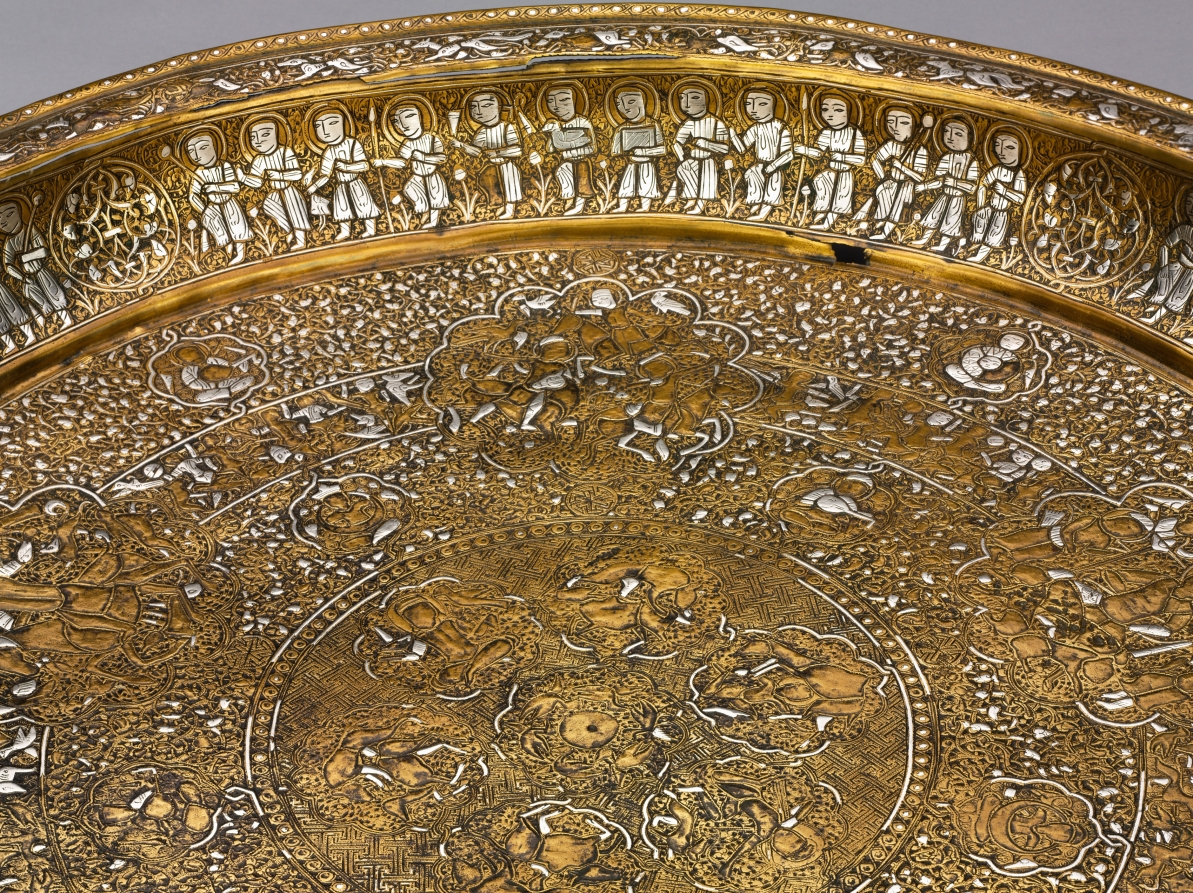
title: Tray Portraying Courtly Pleasures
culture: Syria, Ayyubid period (1171–1260)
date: 1240s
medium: sheet brass inlaid with silver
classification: Metalwork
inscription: The presence of ligatures in the narrow circular bands with interconnected human and animal figures suggests this may be a degenerate form of animated script. It is indecipherable.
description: This tray features images of courtly life interspersed with astronomical symbols. The scenes contained within large multilobed medallions display an enthroned prince with lions at his feet, a banquet, a hunt, dancers, and musicians. Contained within the concentric circles there are also references to solar and lunar motifs, including figures holding sunbursts and lunar crescents. This tray is made of a single sheet of brass and the silver inlay, which is best preserved on the tray’s inner curve, suggests its original brilliance.